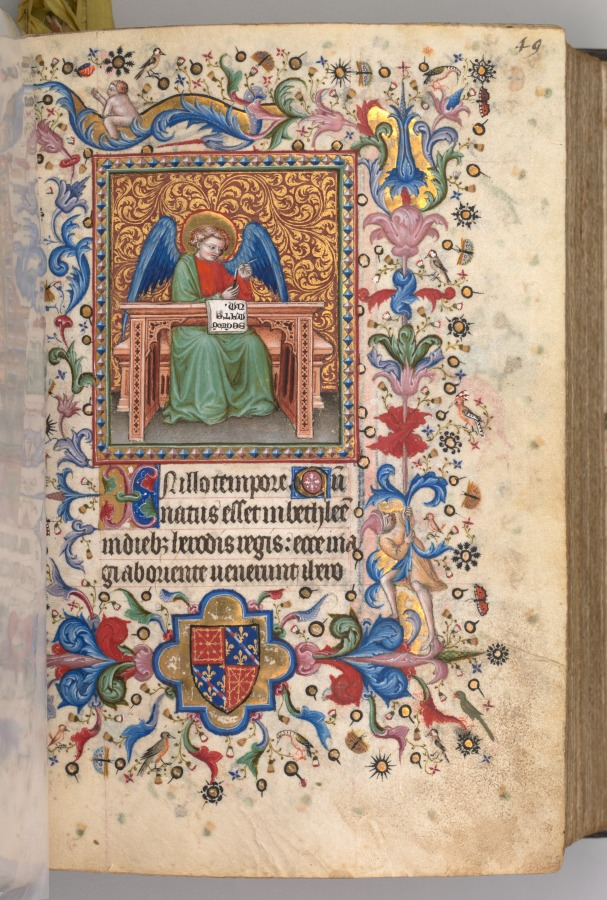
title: Hours of Charles the Noble, King of Navarre (1361-1425): fol. 25a, St. Matthew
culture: France, Paris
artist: Master of the Brussels Initials and Associates (French)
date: c. 1405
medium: ink, tempera, and gold on vellum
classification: Bound Volume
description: This precious volume was obviously highly prized by its owner, the French-born King of Navarre, who had his coat of arms painted on no less than twenty folios. Rather than directly commissioning this manuscript from a specific workshop, it seems that Charles the Noble acquired his book of hours -- perhaps ready-made for the luxury market -- while on a trip to Paris in 1404-05. A collaborative effort, six painting styles are evidenced within the pages of this codex, those of two Italians, two Frenchmen, and two Netherlanders. The painter who was responsible for the planning and decoration of the book, and who produced seventeen of the large miniatures, was a Bolognese artist known as the Master of the Brussels Initials. His principal assistant, responsible for most of the borders, was a Florentine who signed his name "Zecho" da Firenze on folio 208 verso.